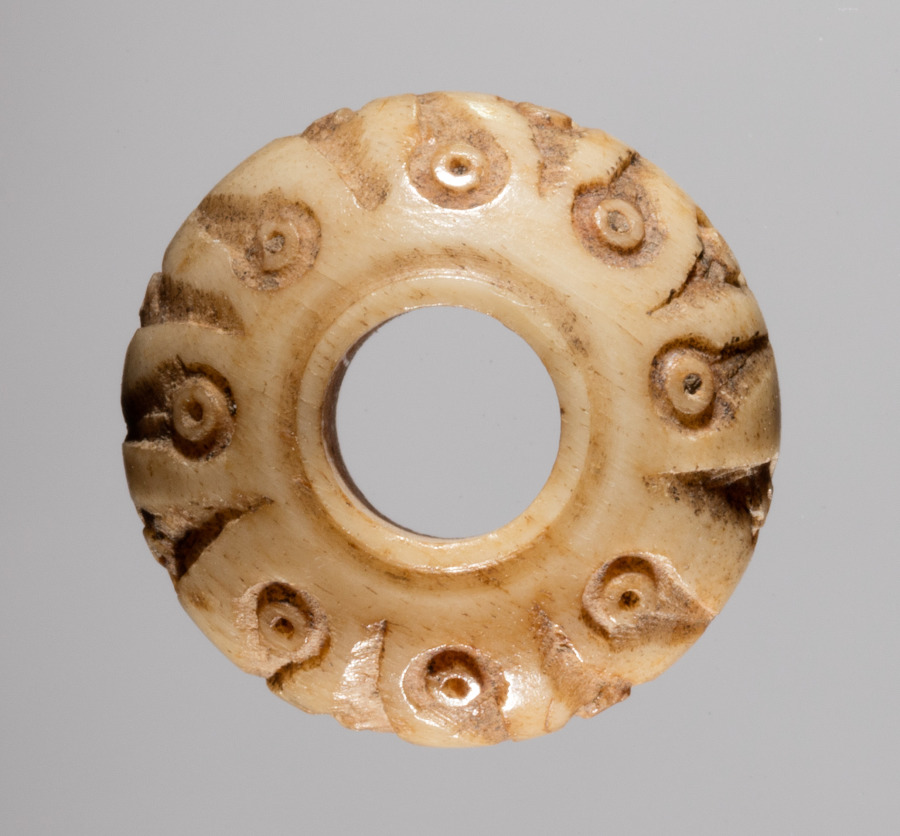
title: Spindle Whorl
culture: Iran, early Islamic period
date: 700s - 900s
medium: bone, incised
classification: Spindle Whorl